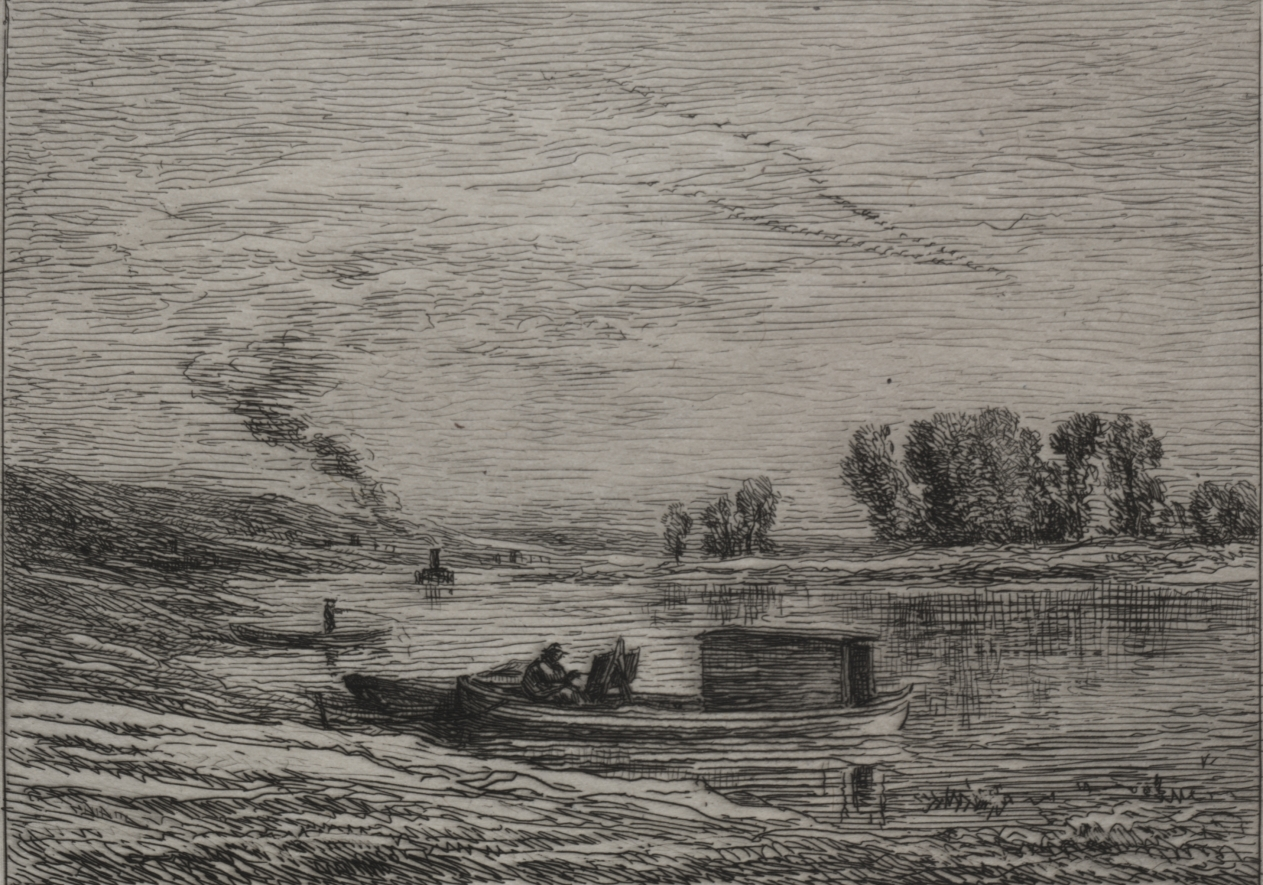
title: The Boat in Conflans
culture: France, 19th century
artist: Charles François Daubigny (French, 1817–1878)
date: 1866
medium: etching on chine collé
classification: Print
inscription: signed, lower left, in plate: Daubigny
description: Closely associated with the Barbizon school artists, Daubigny began his career painting landscapes in the Forest of Fontainebleau. His love of water scenes led him to portray innumerable sites along the rivers of France. In 1857, Daubigny launched his "botin," the studio boat that fostered the development of his plein-air aesthetic by enabling him to paint while traveling the French waterways, such as the Oise, the Marne, and the Seine rivers. This etching of the artist in his "floating studio" is from Voyage en Bateau, an album of etchings recording Daubigny’s river travels with his friend Camille Corot.